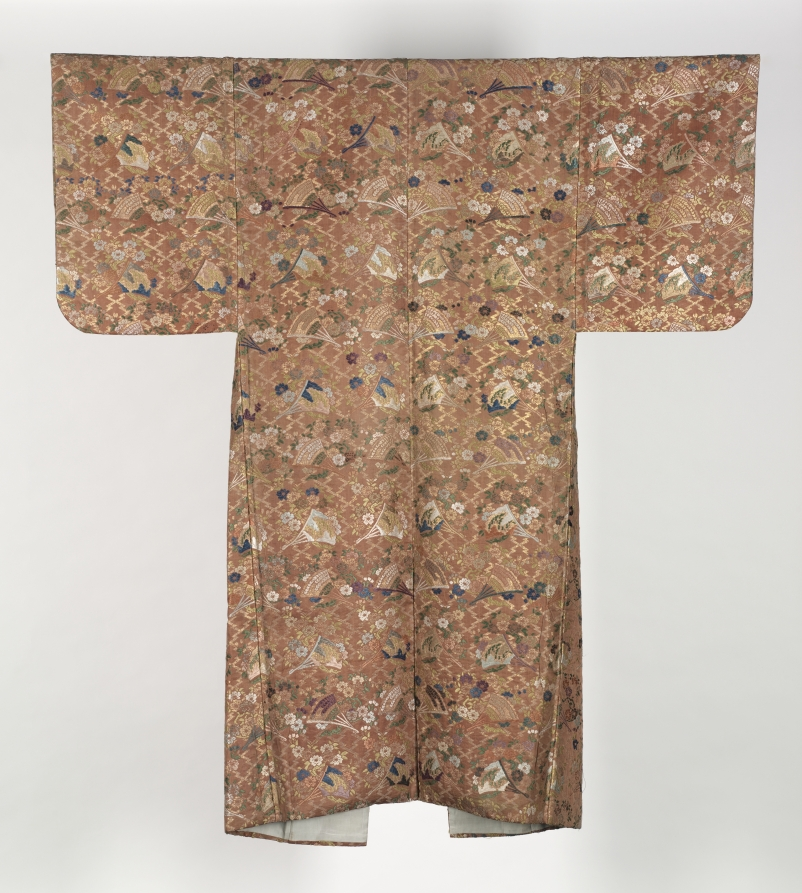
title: Noh Robe (Karaori)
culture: Japan, Edo period (1615–1868)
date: 1800–1850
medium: silkwith supplementary weft, brocaded; metal thread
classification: Garment